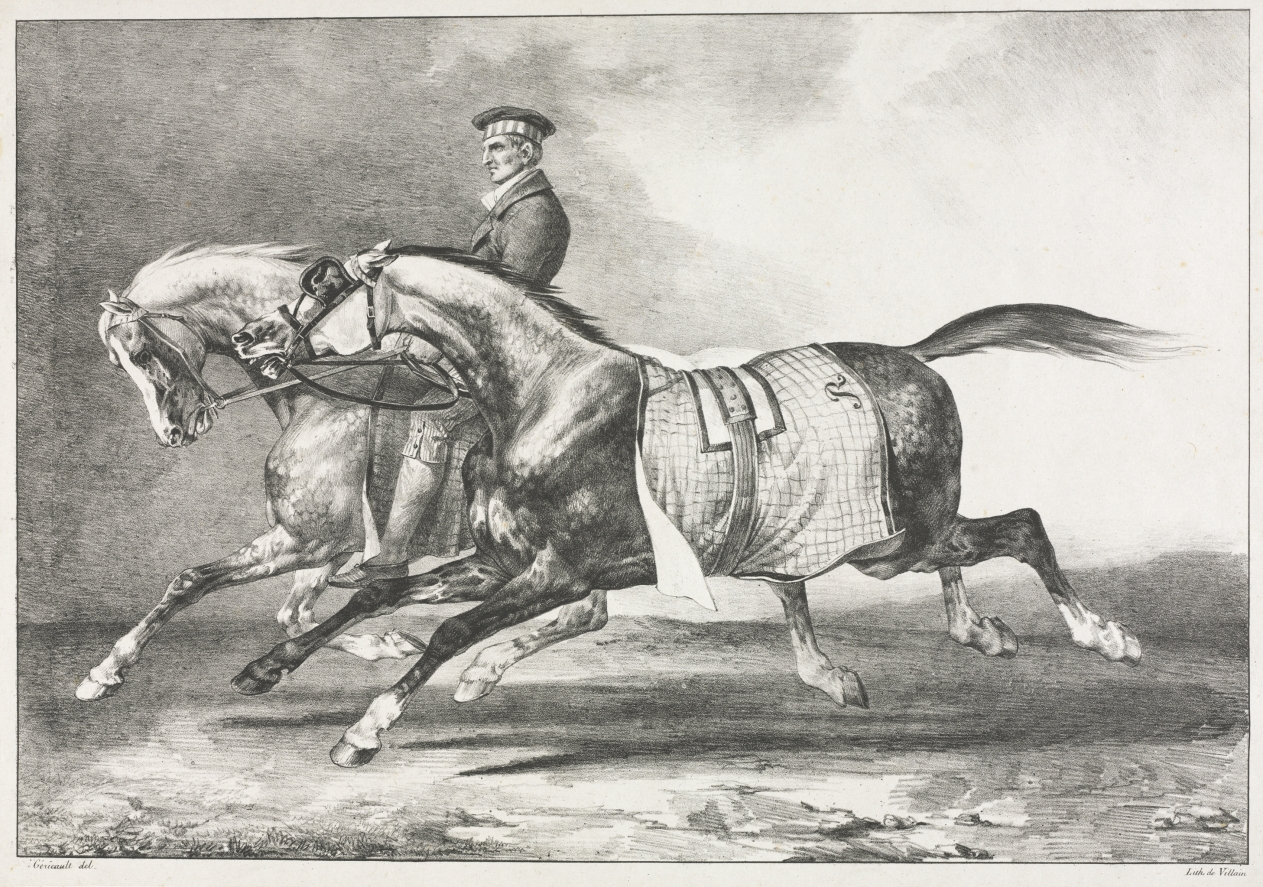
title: Two Dappled Horses Exercising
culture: France, 19th century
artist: Théodore Géricault (French, 1791–1824)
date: 1822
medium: lithograph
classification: Print